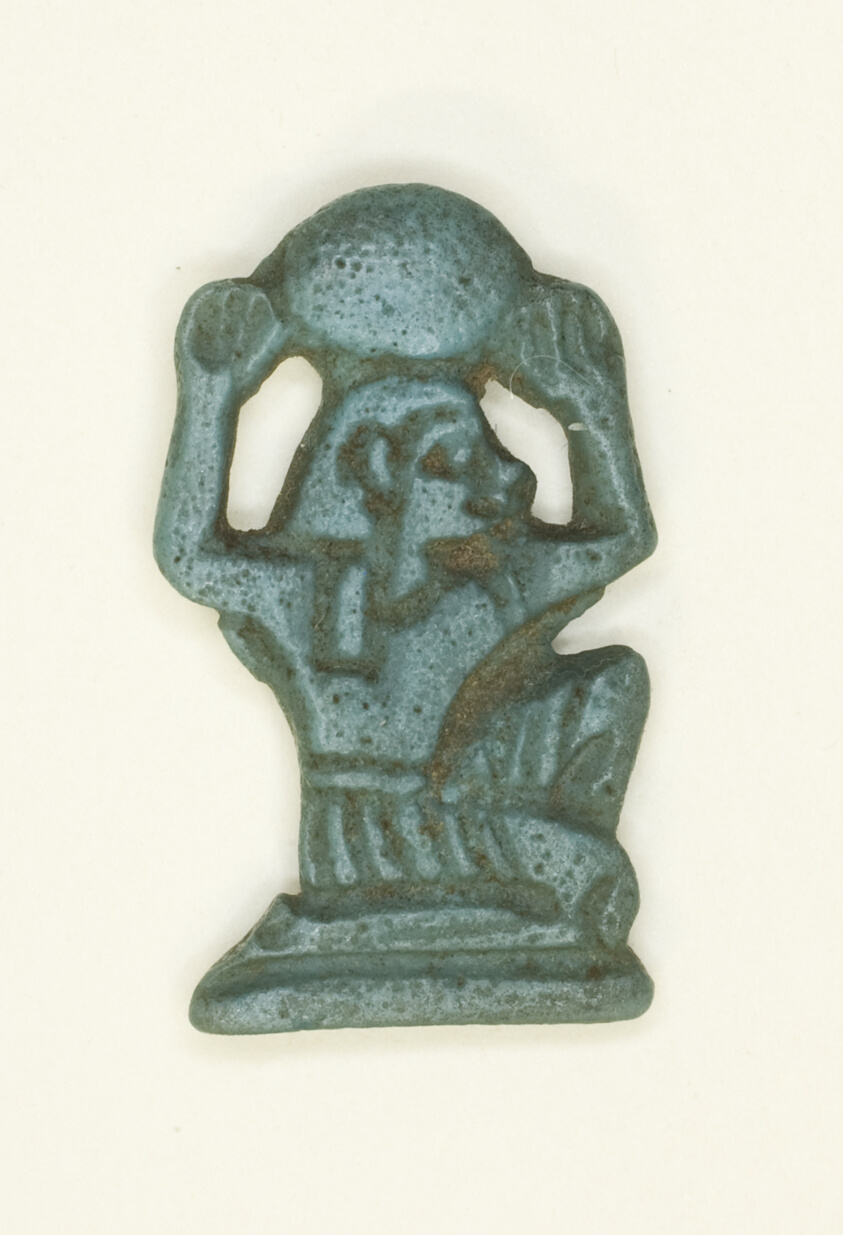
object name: Costume and Accessories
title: Amulet of the God Shu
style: egyptian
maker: Egyptian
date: New Kingdom–Third Intermediate Period, Dynasties 19–25 (about 1186–1069 BCE)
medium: Faience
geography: Egypt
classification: amulet; jewelry; ceramics; ancient art; costume; faïence (composite material)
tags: gods (deities)